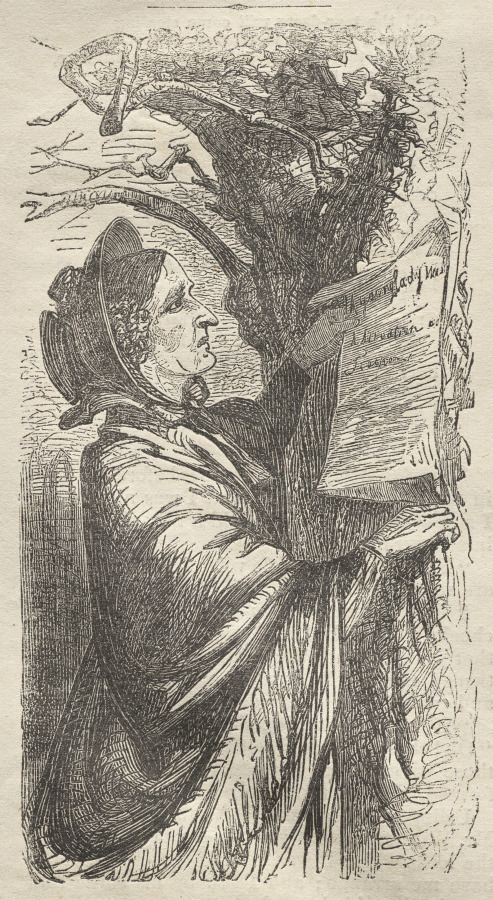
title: Untitled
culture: America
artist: Winslow Homer (American, 1836–1910)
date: 1860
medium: wood engraving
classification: Print